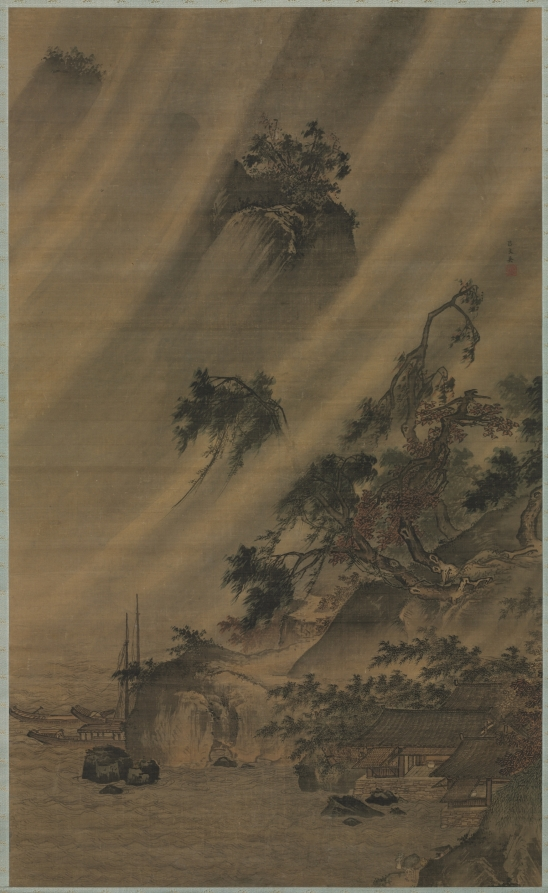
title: River Village in a Rainstorm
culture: China, Ming dynasty (1368–1644)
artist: Lu Wenying (Chinese)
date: c. 1480–1507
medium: Hanging scroll; ink and slight color on silk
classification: Painting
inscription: 呂文英 [印] 日近清光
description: In this scene, windswept rain pelting a village captures the power of nature in a masterful composition. Lü Wenying from Zhejiang served as a court painter during the Hongzhi era (1488–1505). Hardly known, with few remaining works, he is considered a Zhe school painter who followed the style of the Southern Song academy. Zhe school painters, named after the province of Zhejiang, transformed the poetic scenery of the Southern Song artists into dramatic, large-scale views. Active in the same region with frequent monsoon rains in the summer season, artists were familiar with outbreaks of rain and storms.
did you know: A young boy peeks out a window perhaps viewing the two people struggling through the rain.